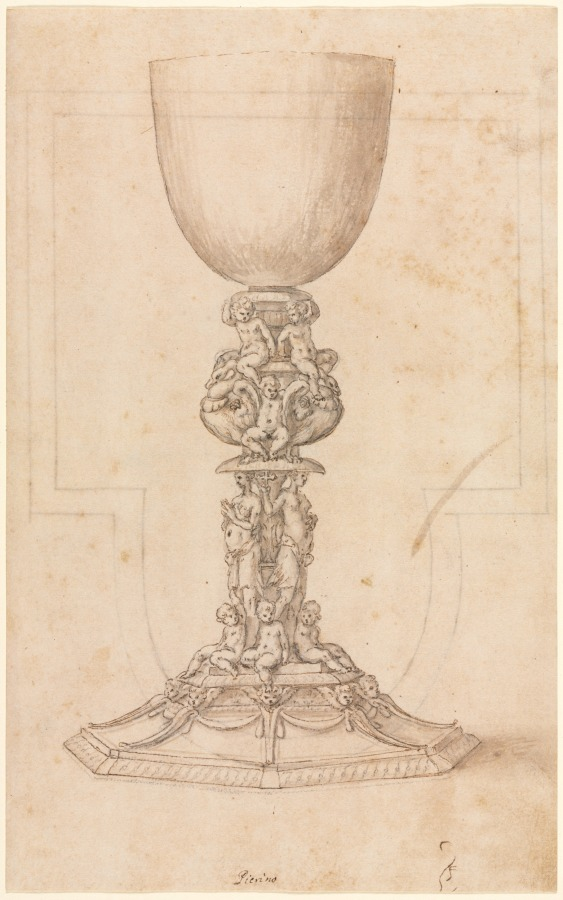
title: Design for a Chalice (recto) Architectural Plan (verso)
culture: Italy, 16th century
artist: Luzio Romano (Italian, active 1528–75)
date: mid-1500s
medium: pen and brown ink and brush and brown wash over black chalk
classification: Drawing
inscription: lower center, in brown ink: Pierino ; VERSO OF SECONDARY SUPPORT, lower center, in graphite: A 3089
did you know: The voluptuous women supporting surrounding the lower stem of this chalice were likely inspired by caryatids--sculpted female figures used as weight bearing columns in classical architecture.